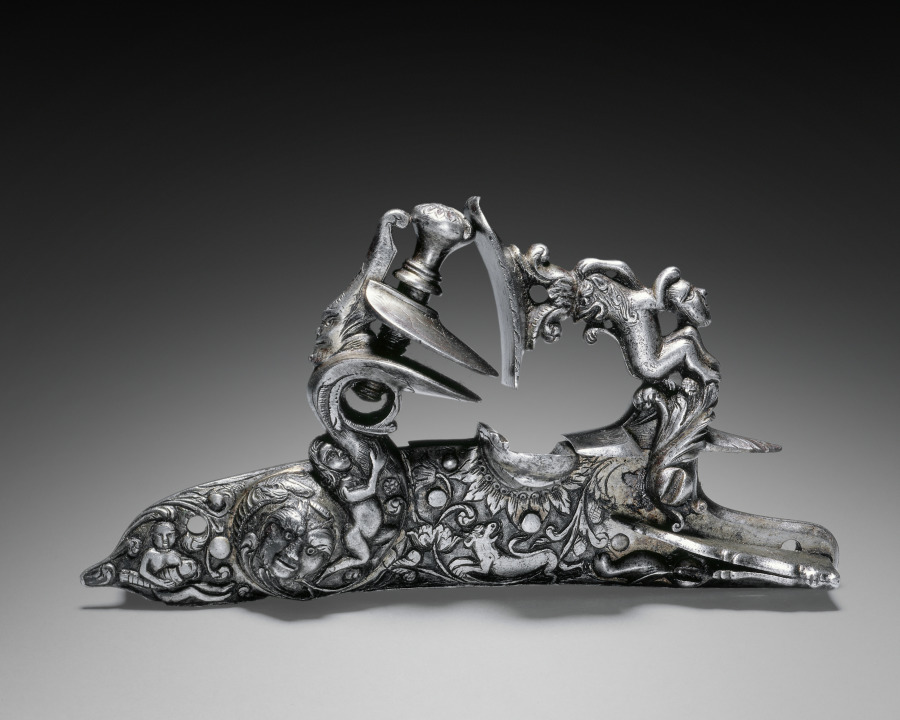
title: Snaphance Gunlock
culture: Italy, Brescia (?), 17th century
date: c.1660–80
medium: steel, chiseled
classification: Arms and Armor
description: The snaphance is a type of lock used for firing a gun. It is a predecessor of the flintlock mechanism.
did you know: This steel gunlock is its own work of art, chiseled with designs of grotesques, masks, and foliage.